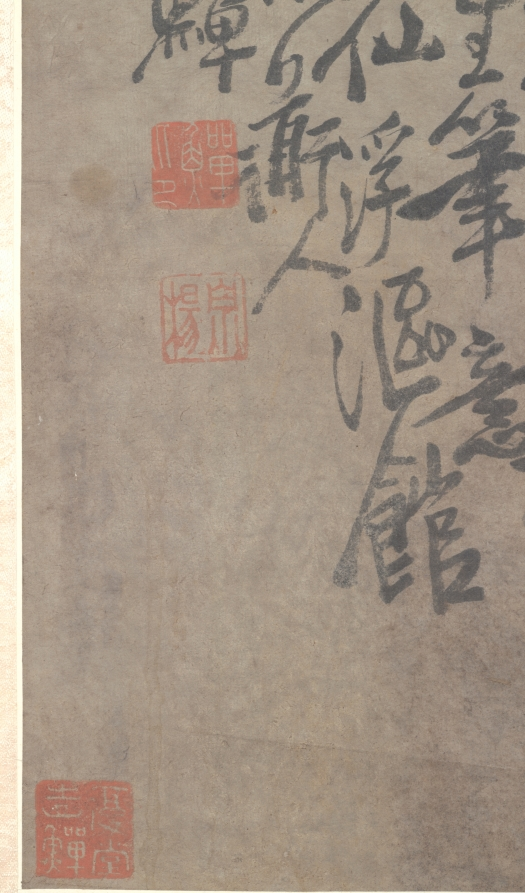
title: Five Pine Trees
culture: China, Qing dynasty (1644–1911), Qianlong reign (1736–95)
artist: Li Shan (Chinese, c. 1686–1762)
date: 1747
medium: Hanging scroll; ink on paper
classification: Painting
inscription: Artist's 5 poems (not translated), inscription, signature, and 4 seals: [seal] Chung-yang. A friend asked me to paint the five pines. I associated the straight pine with a statesman, the bald one with a famous general, the one leaning to one side and the one reclining with dragons, the short round one with foliage like a grass-mat with either an immortal or Buddha. And I composed a long poem as inscription. In autumn, the ninth month of the ting-mao year [1747], the twelfth year of the Ch'ien-lung era, I imitated the style of T'ien-ch'ih sheng [Hsü Wei, 1521-1593], at the Sheng-hsien fu-ou Studio in the southern part of the city. Fu-t'ang, Ao-tao jen, Li Shan. [2 seals] Shan-yin; Tsung-yang. [seal, lower left corner] Fu-t'ang, Li Shan. trans. LYSL/WKH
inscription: 2 additional seals of Cheng Qi 程琦 (1911–1988)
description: Li Shan was born into a family of scholars and officials in Yangzhou. The wealth and status of Li's family assured him an educational and cultural advantage, including his appointment at court. The subjects Li Shan chose to paint—orchids, bamboo, pines, and flowers—reflected his literati background. Five Pine Trees, painted late in his career, is an unconventional work. Rather than having focused on a realistic treatment of the subject, Li created the trees with an interplay of richly modulated strokes, while he utilized a semicursive script among the branches to illustrate the kinship between painting and calligraphy.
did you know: The writing among the branches illustrates the kinship between painting and calligraphy.